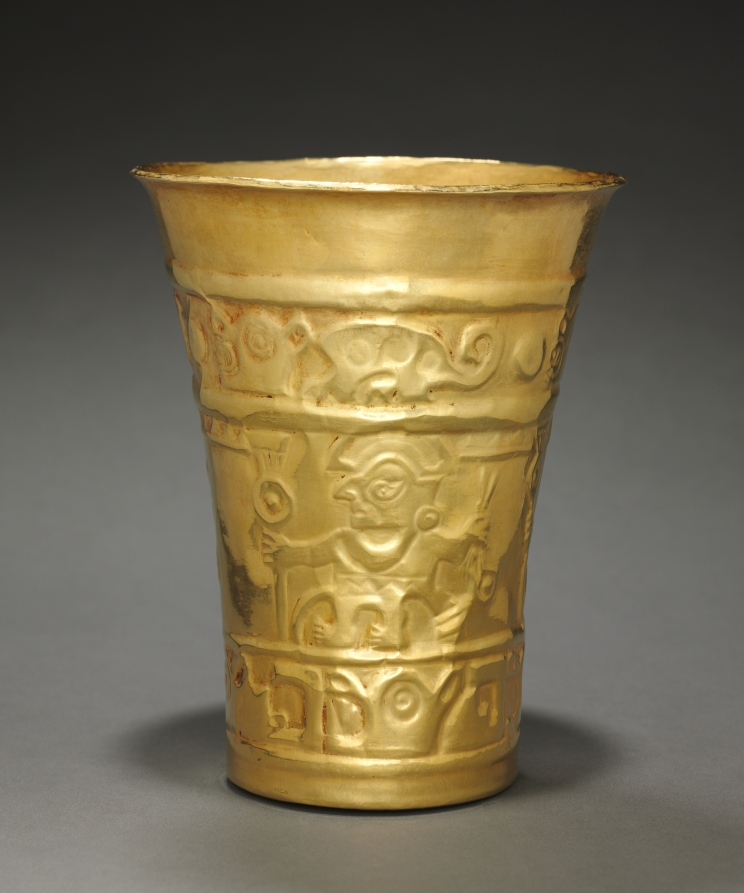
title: Beaker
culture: Peru, North Coast, Sicán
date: c. 800–1370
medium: hammered and embossed gold alloy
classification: Metalwork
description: Profile figures are unusual in Sicán metal beakers. The presence of such figures is one reason the museum is undertaking research to determine whether this vessel is authentic.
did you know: Embossed in the central band of this cup are warriors carrying clubs and slings.